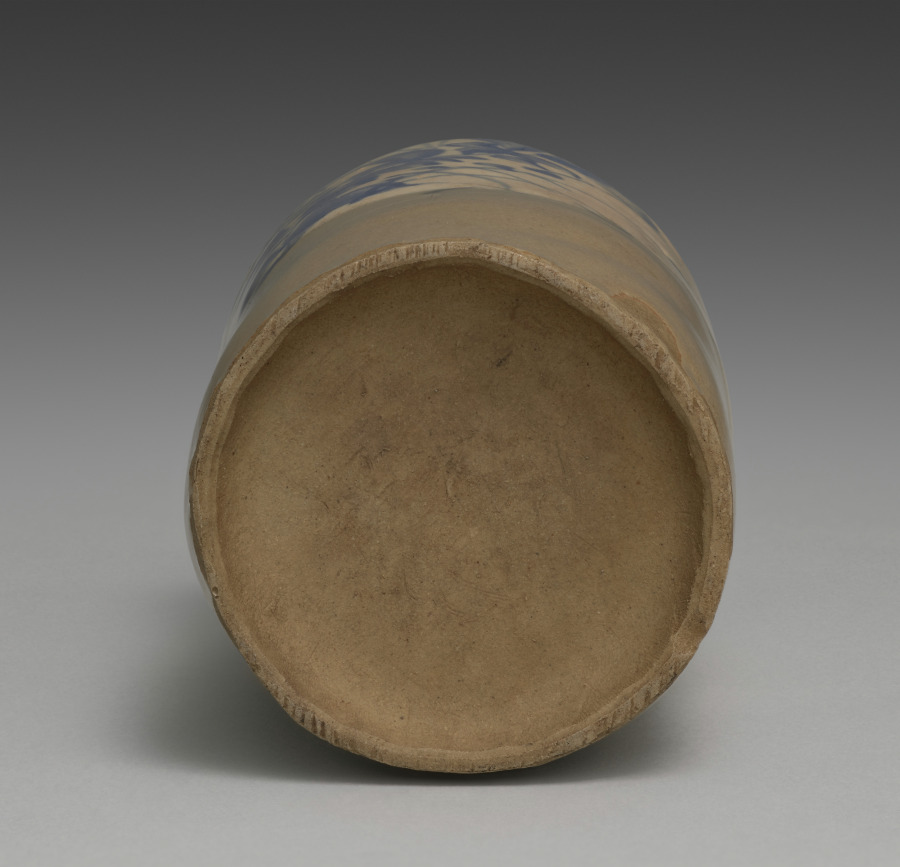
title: Sake Pourer with Bellflowers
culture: Japan, Edo period (1615–1868)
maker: attributed to Seifū Yohei I (Japanese, 1801–1861)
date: c. 1844–57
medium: one of a pair of sake flasks; stoneware with white slip, underglaze blue and gold repair (kintsugi) (Kyoto ware)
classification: Ceramic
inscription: The storage box for the pair of vessels is inscribed and impressed with seals.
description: This pair of sake pourers adorned with with bamboo and bellflowers is attributed to the founder of the Seifū Studio, Seifū Yohei I (1801–1861). Yohei I, the lineage founder, was born to the Yasuda family in the city of Kanazawa, which faces the Sea of Japan. His home province of Kaga (in present-day Ishikawa Prefecture) produced its own ceramics, known as Kutani ware, but for his training as a potter, Yohei I chose Kyoto, which produced the more technically advanced porcelain ware. He moved to Kyoto around the 1820s and became apprenticed to Nin’ami Dohachi, a leading potter in the city. He later struck out on his own, and it is likely that his teacher gave him the name Seifu Yohei. His works include many exquisitely painted copies of Chinese porcelain, and he also produced stoneware with overglaze color enamels that emulated works in the style of Ogata Kenzan (1663–1743) at which his teacher excelled.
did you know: Kintsugi is the Japanese art of repairing broken pottery by mending the areas of breakage with urushi lacquer dusted or mixed with powdered gold.